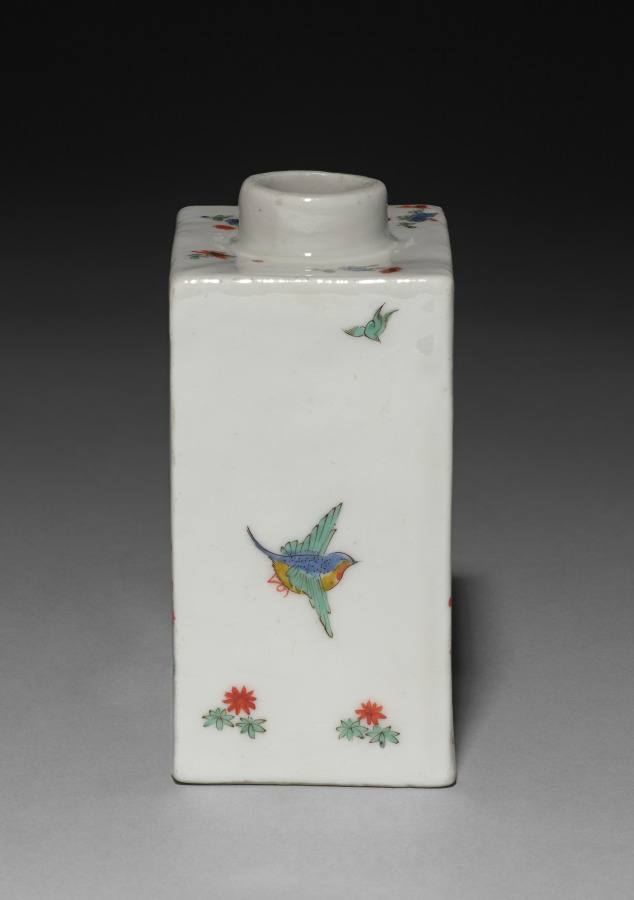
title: Tea Caddy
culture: Germany, Meissen, 18th century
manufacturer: Meissen Porcelain Factory (German, est. c. 1710)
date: c. 1735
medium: porcelain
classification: Ceramic